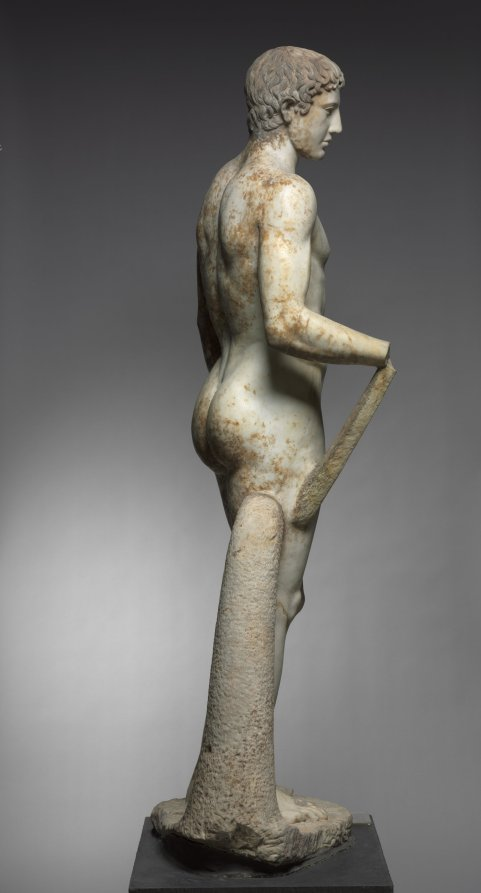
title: Statue of an Athlete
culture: Italy, Roman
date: 1–100 CE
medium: marble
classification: Sculpture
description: This idealized athlete recalls Greek sculptural types invented and popularized during the 400s BC. Large-scale athletes and other sculptures like this were originally created by famous artists as sanctuary dedications. Centuries later, they were widely copied and adapted by Roman sculptors, whose clients sought their own versions of earlier masterpieces. Working in marble rather than bronze, these sculptors added certain elements for stability, such as the struts and the large tree trunk beside the right leg here. Sculptures like this one are profoundly complex, made by and for Romans but descended from Greek ancestors.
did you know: For many years, this sculpture stood in the rotunda of the Cleveland Museum of Art.